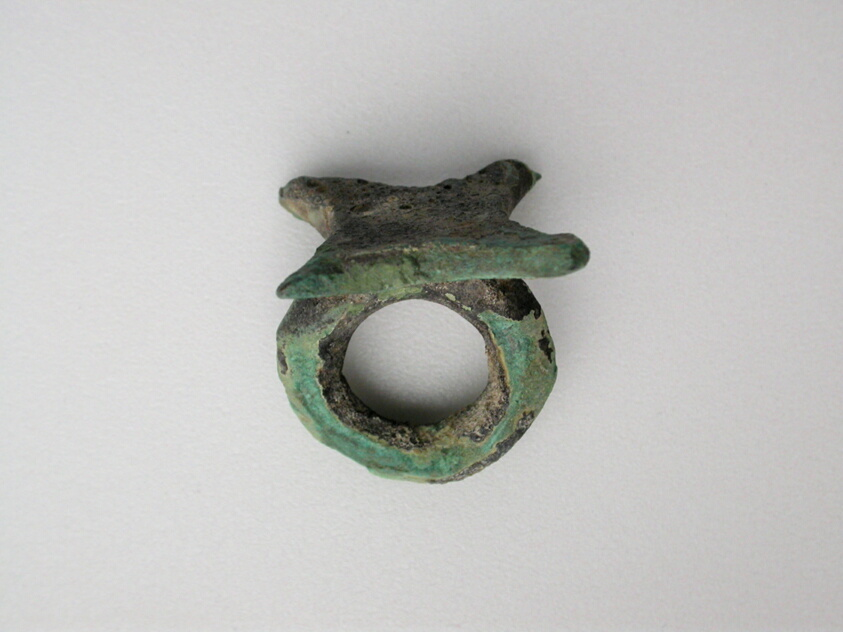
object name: Costume and Accessories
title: Ring with Ingot Bezel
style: geometric, ancient, greek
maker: Greek; Thessaly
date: Geometric Period (800–700 BCE)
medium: Bronze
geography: Thessalía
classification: votive offering; ex-voto; costume